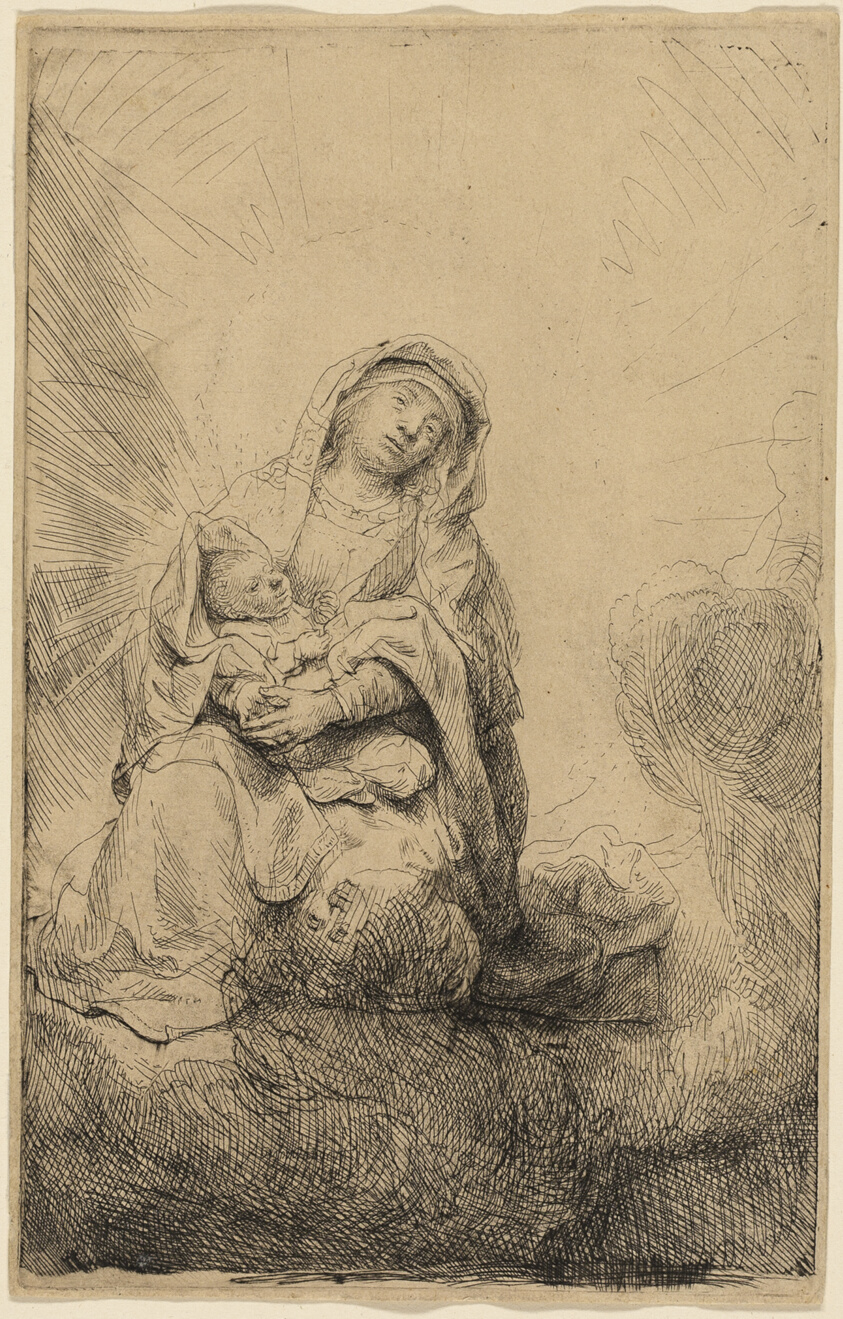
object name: Print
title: The Virgin and Child in the Clouds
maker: Rembrandt van Rijn (Dutch, 1606-1669)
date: 1641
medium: Etching on cream laid paper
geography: Holland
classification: etching; print; prints and drawing; paper